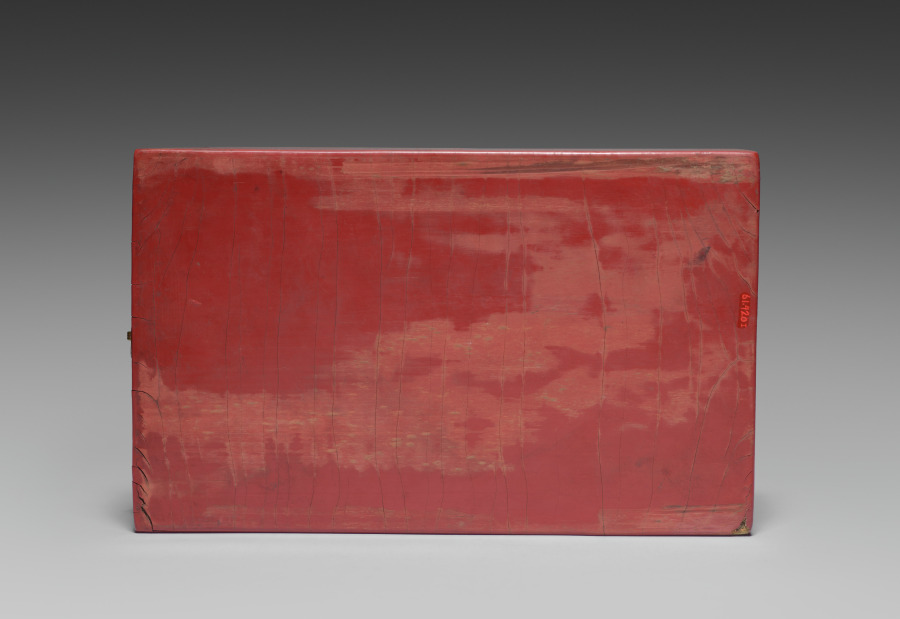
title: Drawer for a Tihong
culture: China, Ming dynasty (1368-1644), Wanli reign (1572-1620)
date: 1585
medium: carved cinnabar lacquer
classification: Lacquer